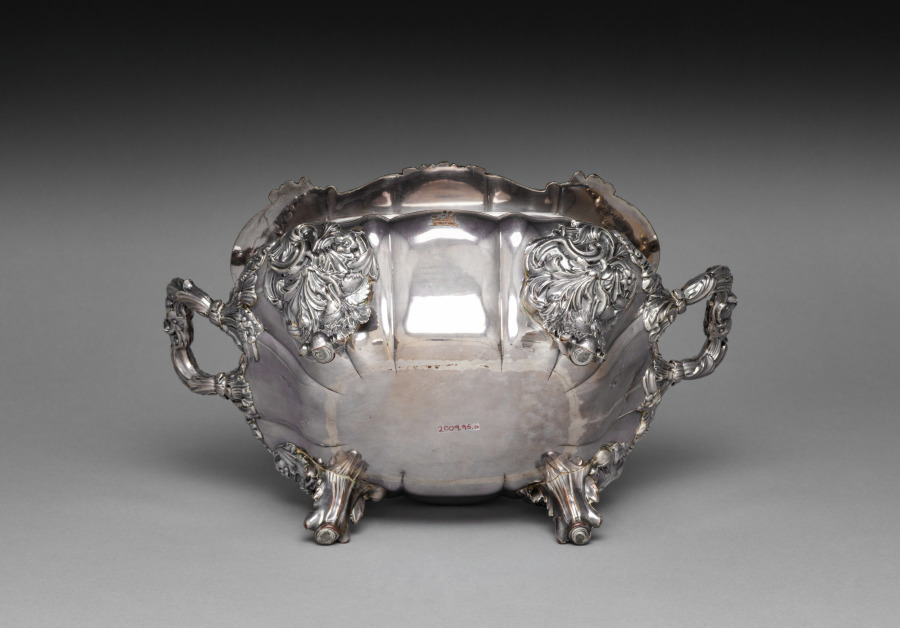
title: Tureen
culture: England, Sheffield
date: c. 1830–50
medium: Silver plated on copper (Old Sheffield Plate)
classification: Silver